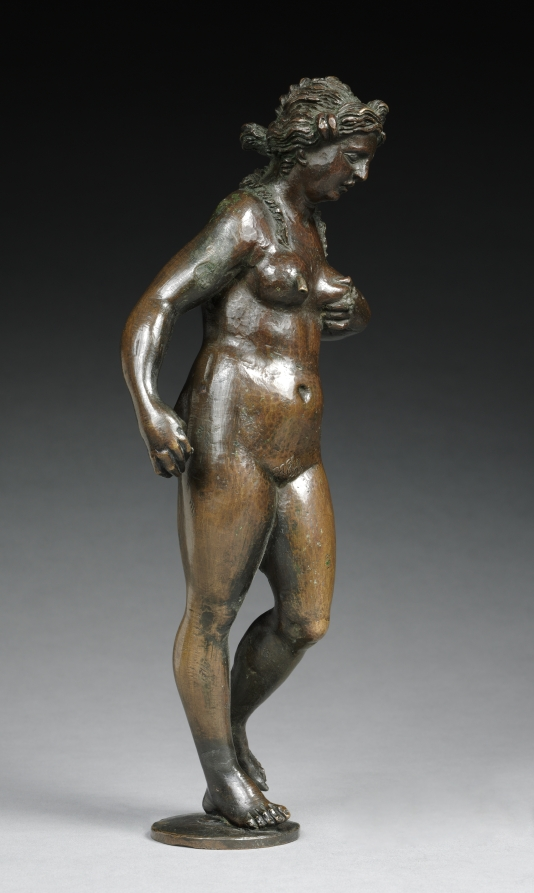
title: Fountain Figure of Abundance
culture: Germany, Augsburg, 16th century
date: c. 1530–40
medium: bronze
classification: Sculpture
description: The spout coming out of the breast indicates that this figure was part of a table fountain--a specialty of Augsburg artists. Her nudity and naturalistic proportions demonstrate the impact of Italian Renaissance art in southern Germany during the early 1500s.